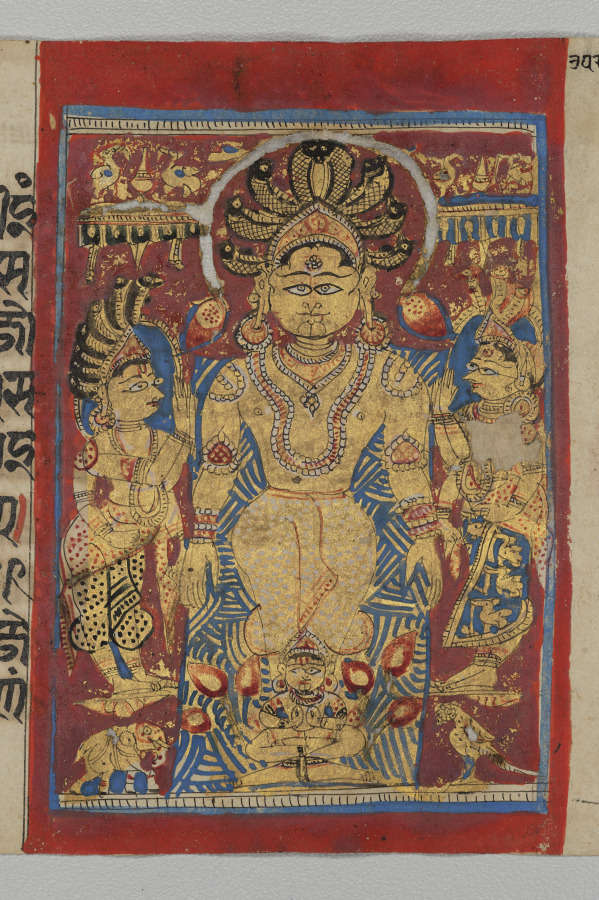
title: Parshva Undergoes Physical Trials, Folio 46 (recto), from a Kalpa-sutra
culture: Western India, Gujarat, late 15th-early 16th century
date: c. 1500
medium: Gum tempera, ink, and gold on paper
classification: Painting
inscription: [[upper right]] upasarga kāyāsahai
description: Parshva stands in a yogic posture of meditation, bearing the hardship of the elements, unmoved. When stormwaters threatened his life, serpents shielded him so that he could complete his meditations and reach liberation. One cobra stretched his seven-hooded canopy over his head like an umbrella, while a serpent king and his wife praise him. The abstract gold lines on the blue background represent the waters that rose to the level of his shoulders. In this painting, the image of Parshva wears a white lower garment, which indicates that this manuscript was made for the prominent branch of Jainism that allows monks and nuns to wear white robes.